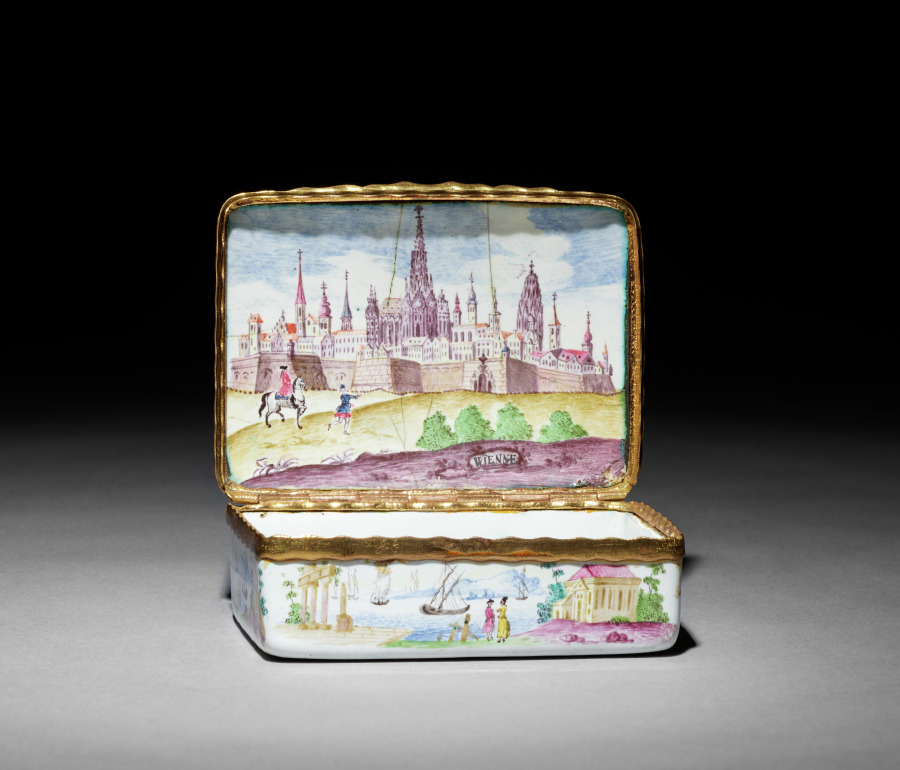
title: Snuff Box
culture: Austria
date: c. 1750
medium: enamel on copper with metal mounts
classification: Miscellaneous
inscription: on top there are a number of inscriptions in black: "Roma," "Trevere R," "C:ST: Ang" (for Castello San Angelo), "S: Pe:" (for San Pietro), "S.G.L." (probably for San Giovanni Laterano). on interior of lid: "WIENNE."